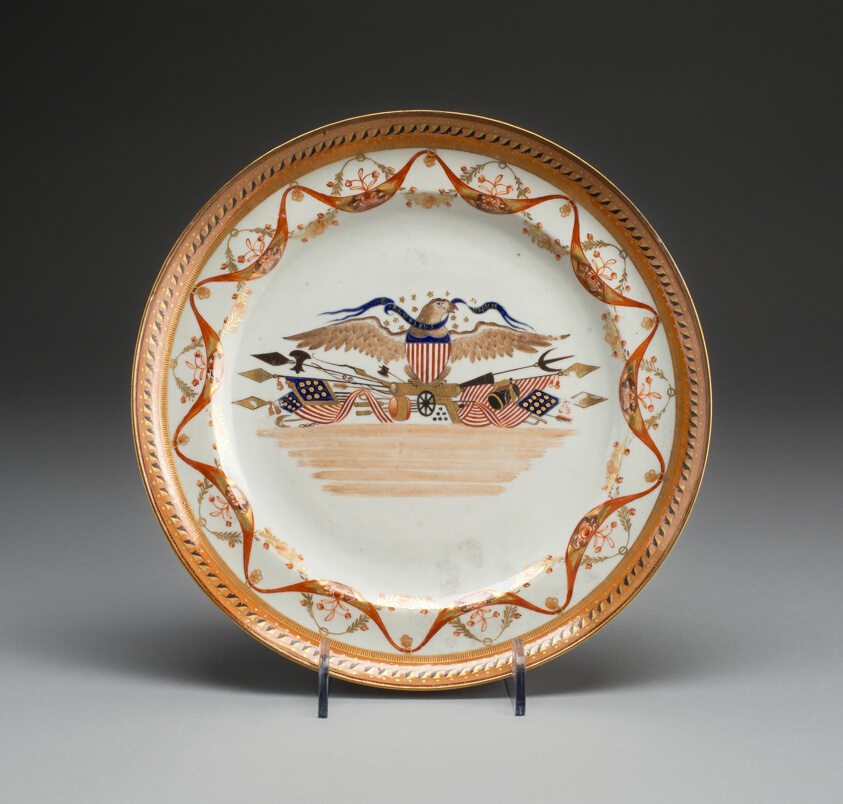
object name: Ceramics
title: Plate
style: chinese export, Export porcelain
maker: Artist unknown (Chinese, made for the American market); China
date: 1800–12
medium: Hard-paste porcelain, glaze, enamels and gilding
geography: China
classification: plate (general, dish); porcelain; dish (vessel); art of the americas; ceramics; decorative arts; American market; chinese export porcelain; pottery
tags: eagle, American eagle, eagle with shield